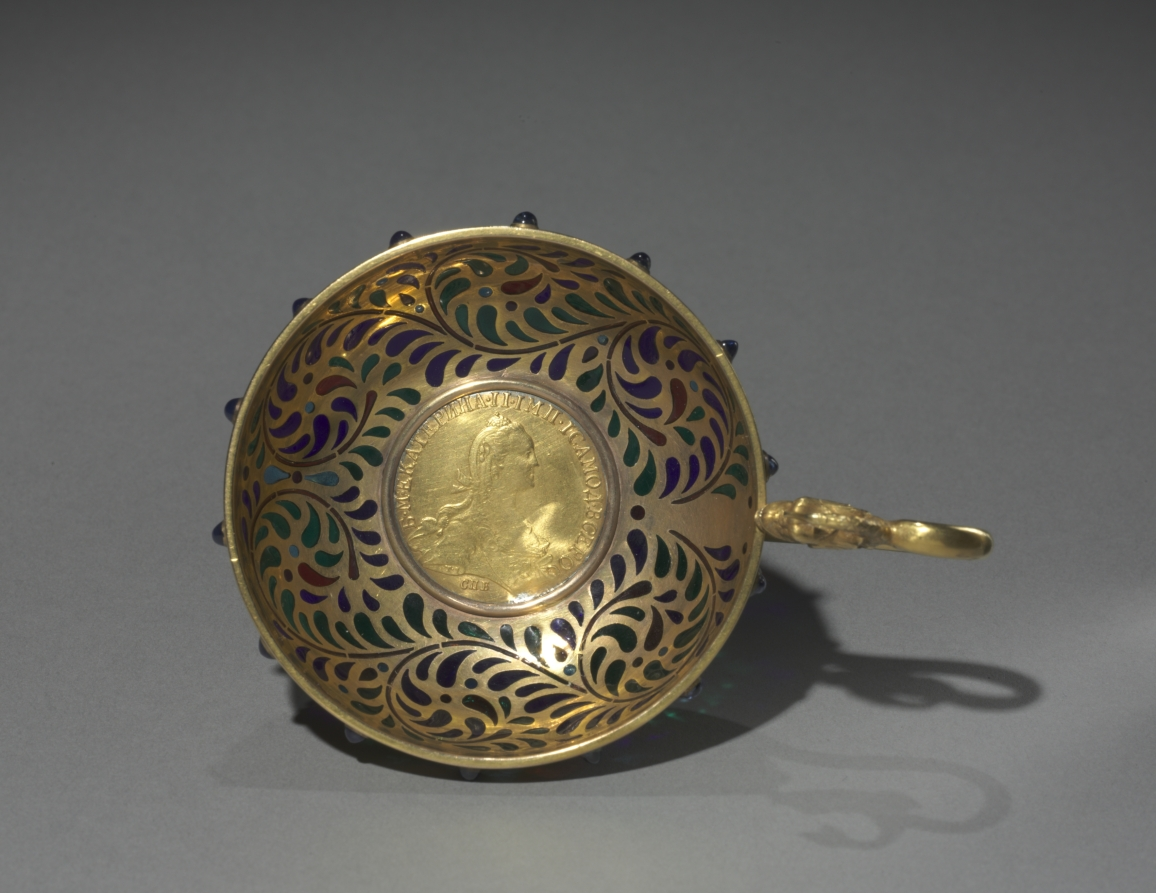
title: Charka (Drinking Vessel)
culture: Russia, Moscow(?), late 19th-early 20th Century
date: late 1800s-early 1900s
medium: gold, plique-a-jour enamels, gold coin, sapphires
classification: Miscellaneous